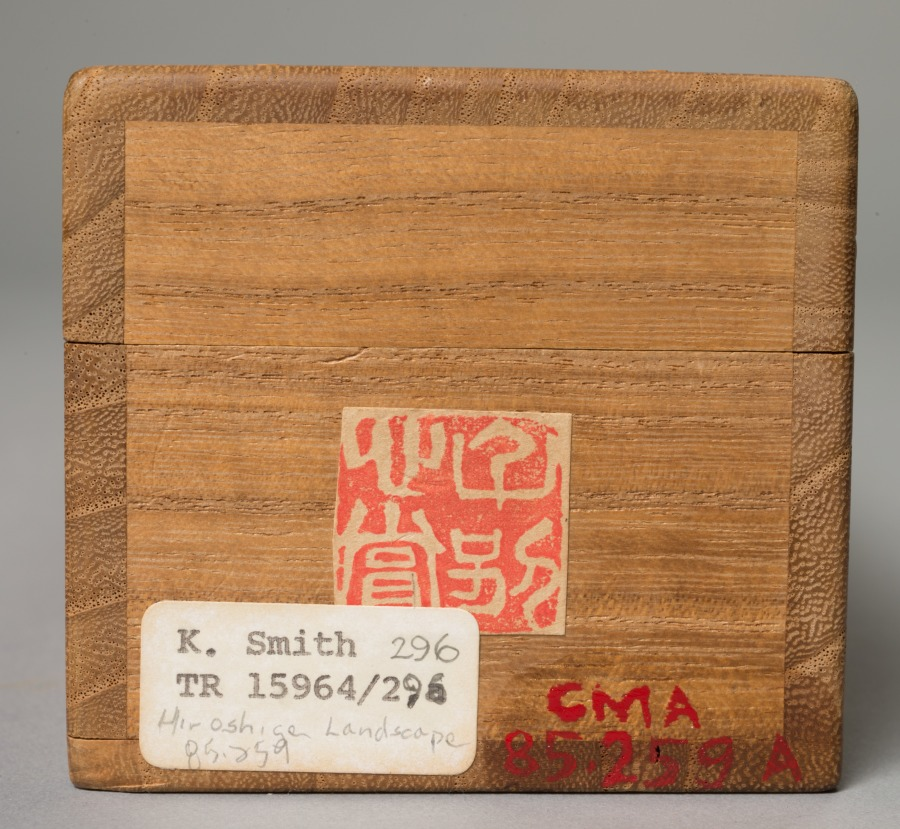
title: Lake Suwa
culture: Japan, Edo period (1615–1868)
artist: Utagawa Hiroshige (Japanese, 1797–1858)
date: c. 1832–58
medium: hanging scroll; ink and color on silk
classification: Painting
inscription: 立斎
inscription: 廣重